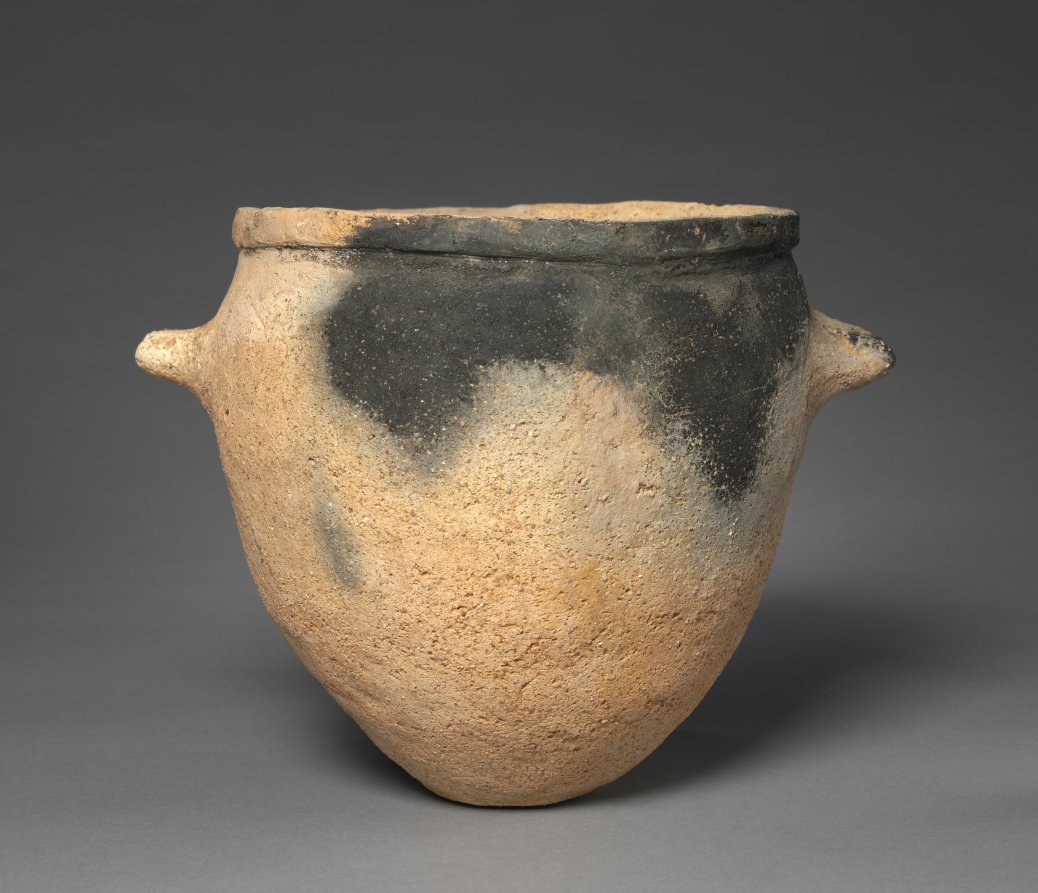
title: Vessel with Two Lugs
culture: Korea, Proto-Three Kingdoms period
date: 100s BCE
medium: earthenware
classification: Ceramic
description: The form of this early earthenware pot corresponds rather closely to the red earthenware vessel with horn-shaped handles (CMA 1997.186). The attractive, gritty fabric of the clay body, the sooty black firing marks as well as the folded and hand-crimped rim help clarify the evolution of this functional shape in early Korean ceramic history.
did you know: This earthenware with two handles may have been used for cooking.